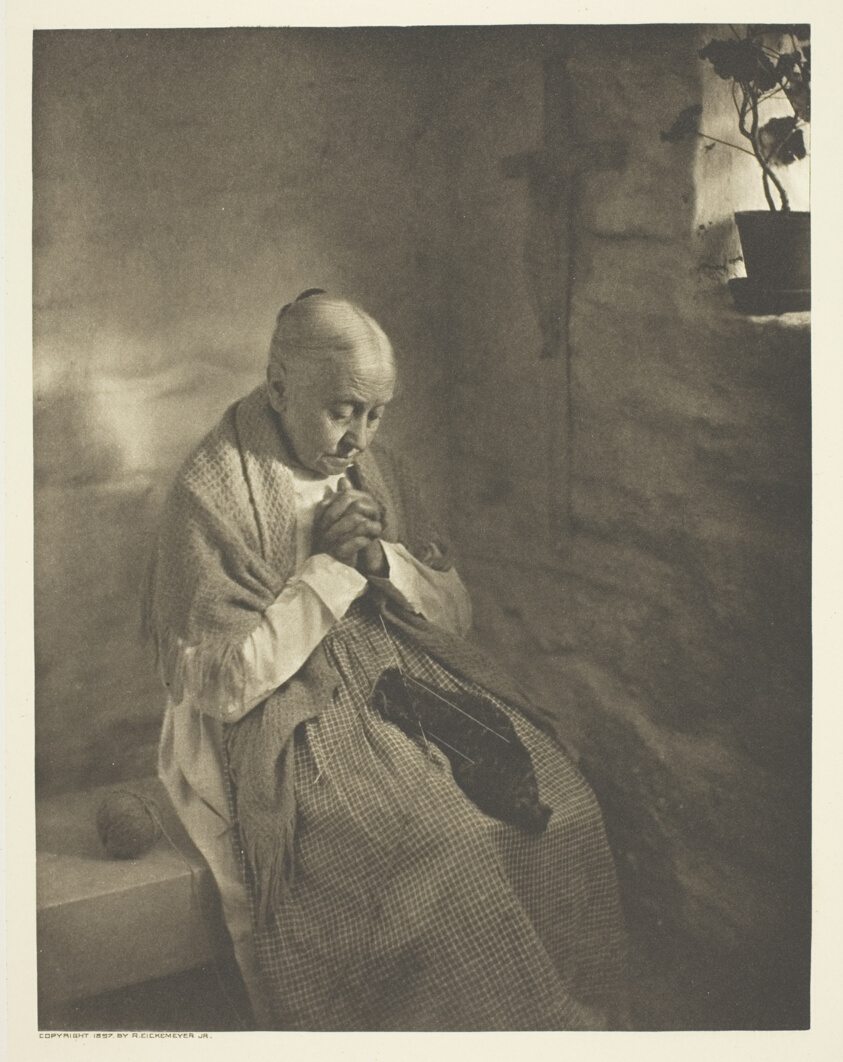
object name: Photograph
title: Vesper Bells, No. 6 from the portfolio "American Pictorial Photography, Series I" (1899); edition 146/150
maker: Rudolf Eickemeyer, Jr. (American, 1862–1932)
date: 1897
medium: Photogravure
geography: United States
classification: photogravure; photomechanical process; photography; photograph